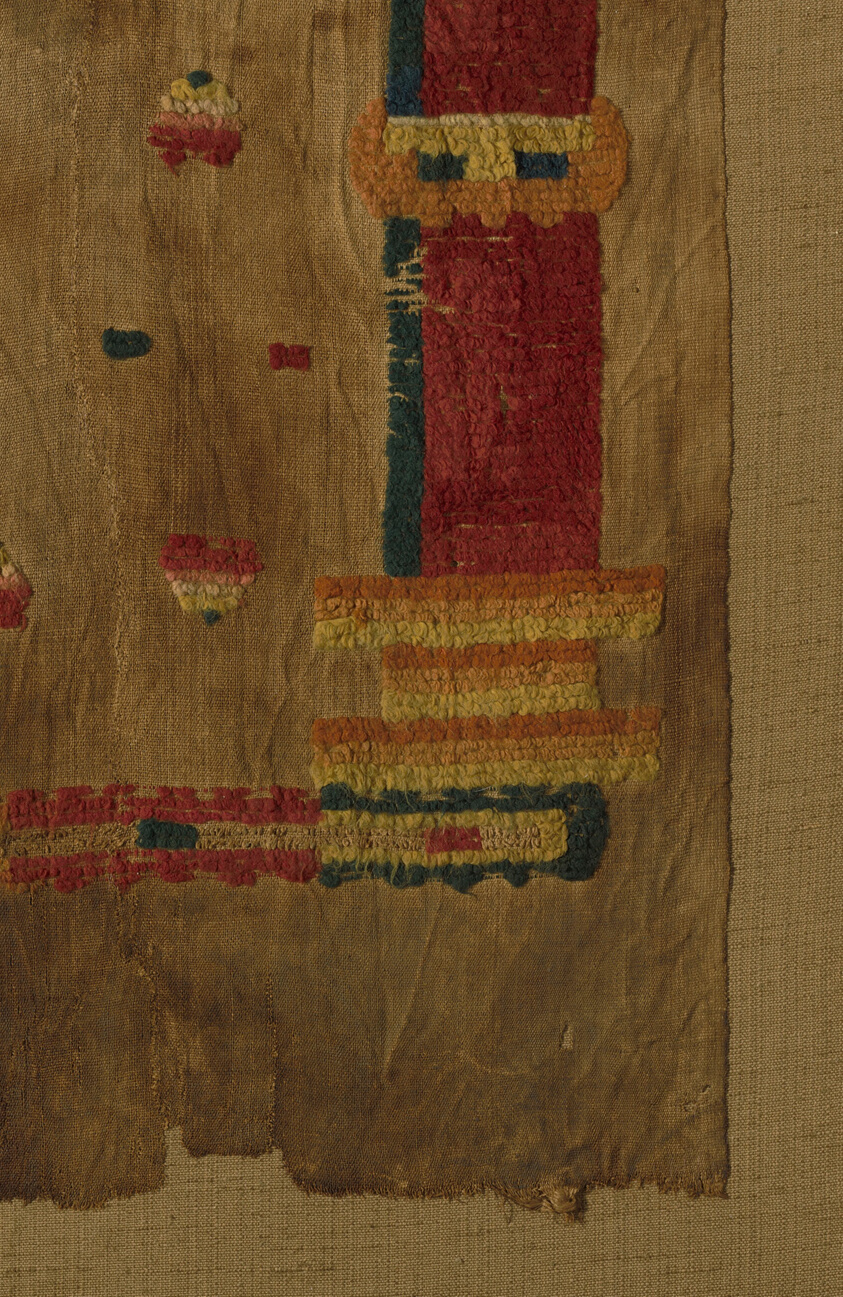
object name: Coverings and Hangings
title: Fragment (Hanging)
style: roman period (egyptian), coptic (period)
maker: Byzantine; Egypt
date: Roman period (30 B.C.– 641 A.D.), 5th/6th century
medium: Linen and wool, plain weave with weft uncut pile and embroidered linen pile formed by variations of back and stem stitches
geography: Egypt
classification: textile; weaving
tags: men, architecture, decoration, columns, arches